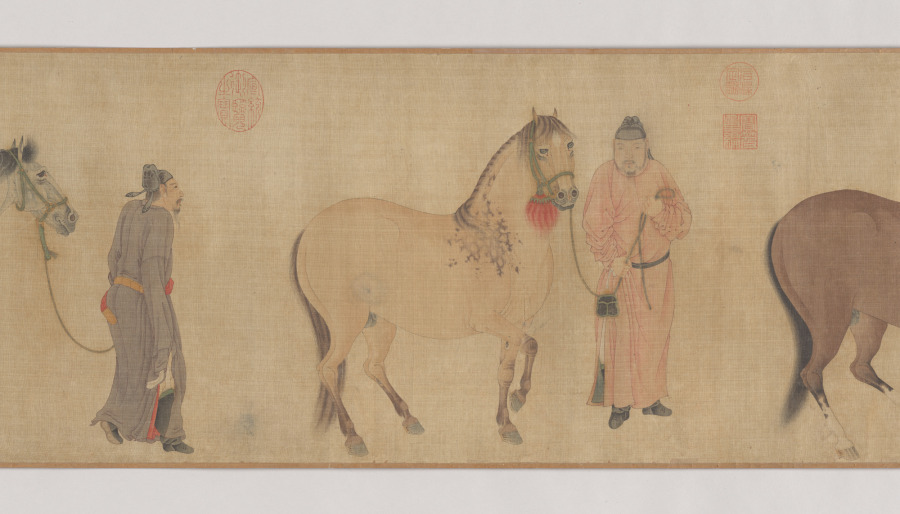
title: Three Horses and Four Grooms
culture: China, Yuan dynasty (1271-1368)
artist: Ren Renfa (Chinese, 1254–1328)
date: c. 1320s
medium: handscroll, ink and color on silk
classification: Painting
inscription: 月山道人. [印] 任氏子明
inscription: 1 colophon and 16 additional seals: 1 poem, 1 colophon dated 1552 or 1612, and 3 seals of Wang Yiying 王一瀛 (1500s); 2 seals of Liang Qingbiao 梁清標 (1620-1691); 6 seals of the Qianlong 乾隆 Emperor (r. 1736-95); 3 seals of the Jiaqing 嘉慶 Emperor (r. 1796-1821); 1 seal of the Xuantong 宣統 Emperor (r. 1908-12); 1 seal of Yu Xiezhong 余協中 (1900s).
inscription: Poem and colophon by Wang Yiying 王一瀛 (1500s): As for painters of horses in the previous dynasty, Surely the name of Yueshan [Ren Renfa] must come first. Under his brush and on his silk, They seem to have just galloped out from the imperial stud. Now as the world overflows with inferiority, Who, from the stable, can recognize a dragon-horse amidst mediocrity. Ren Yueshan [Ren Renfa] of the Yuan Dynasty was best in horse paintings. The three fine steeds he painted in this scroll are so dashing, so vigorous in spirit that they have indeed grasped some of the "brush-idea" of Han Gan. Not long ago this painting came into the possession of Mr. Gui Shanquan, who asked for my inscription. And I, while reading the old manuscripts of Hengshan [Wen Zhengming, 1470-1559], by accident, came cross the poem quoted above. As the ancients said "in painting horses, Master Han was [inspired by and produced] real horses; in composing poems, Master Su [Su Dongpo, the leading Song poet] wrote as if a painting were before him." These are truly what should be considered the two excellences; indeed, they are to be treasured. In the sixth month of the renzi year [either 1552 or 1612]. Jian feng shan ren [The Mountain Dweller of the Sword Peak], Wang Yiying, written in the Qu si ting Pavilion at Chiyang.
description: Ren Renfa's horse images are elegant in appearance and vigorous in spirit. His work attracted not only Chinese scholars but also the Mongols at the imperial court. Inspired by the contemporary scholarly interest in restoring a sense of antiquity in art—an artistic direction led by Zhao Mengfu that exerted a great impact in the Yuan art scene—Ren Renfa, like Zhao Mengfu, modeled his depictions of horses after the Song master Li Gonglin. Another key style component that Ren introduced to this genre was a revival of the Tang classical tradition. The refined color treatment of the horses as seen here was derived from the Tang master Han Gan.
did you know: Only the elegant first horse with a white blaze is accompanied by two grooms, as if its lightning speed required extra supervision.